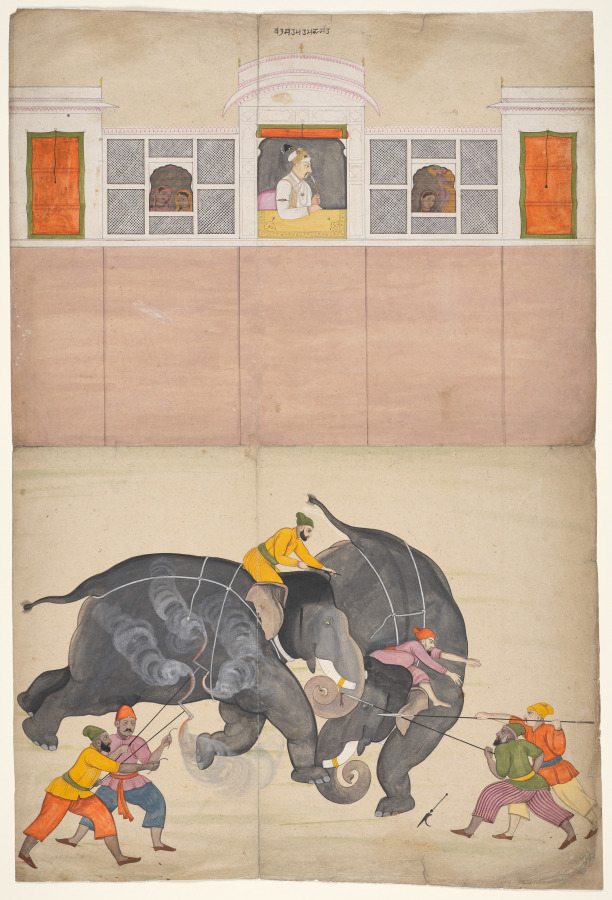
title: Two Elephants Fighting in a Courtyard Before Muhammad Shah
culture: Northern India, Himachal Pradesh, Guler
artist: attributed to Nainsukh (Indian, 1710–1778)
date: c. 1730–40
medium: Gum tempera, ink, and gold on paper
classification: Painting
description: The Mughal emperor responsible for a revival of courtly arts and pastimes was Muhammad Shah (reigned 1719–48). This painting was made by an artist from a small kingdom in the western Himalayas who stayed at the Mughal court in Delhi and painted scenes of his experiences. Like his predecessors, Muhammad Shah enjoyed watching elephant fights. He is shown in his window of public audience, marked by a golden carpet, smoking a hookah. Women from his harem can be seen looking on from behind painted screens. Two pairs of men hold fire brands and spears to prevent the elephants from running off and to keep them under control. The intensity of the fight—captured at a moment when one mahout, or elephant trainer, has dropped his goad and is about to jump off—is augmented by the dense colors and forms in contrast to the otherwise pale planes, balanced only by the strip of palace windows.